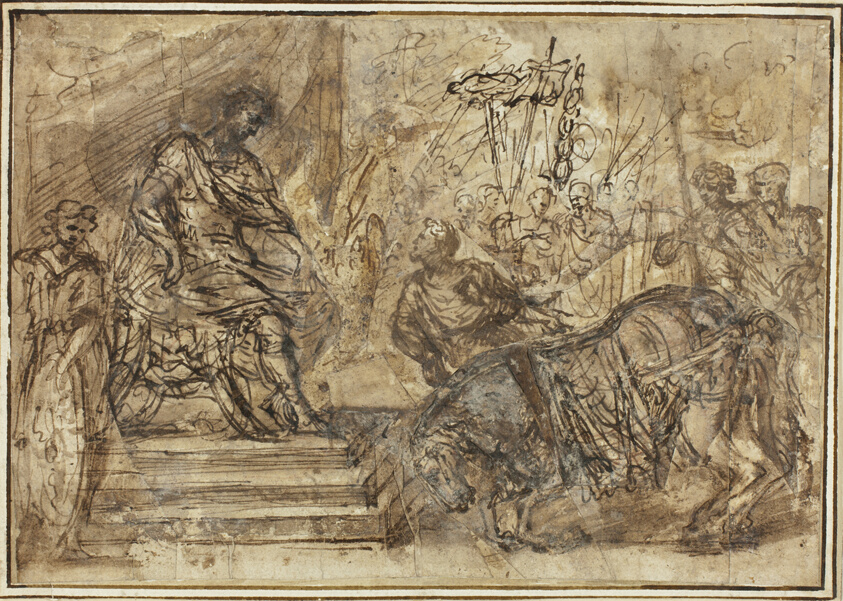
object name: Drawing and Watercolor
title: Caligula Appointing His Horse Incitatus to the Consulship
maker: Style of Pietro da Cortona (Italian, 1596-1669)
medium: Pen and brown ink with brush and brown wash, on collage of ivory wove papers, laid down on ivory laid paper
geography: Italy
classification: drawings (visual works); prints and drawing